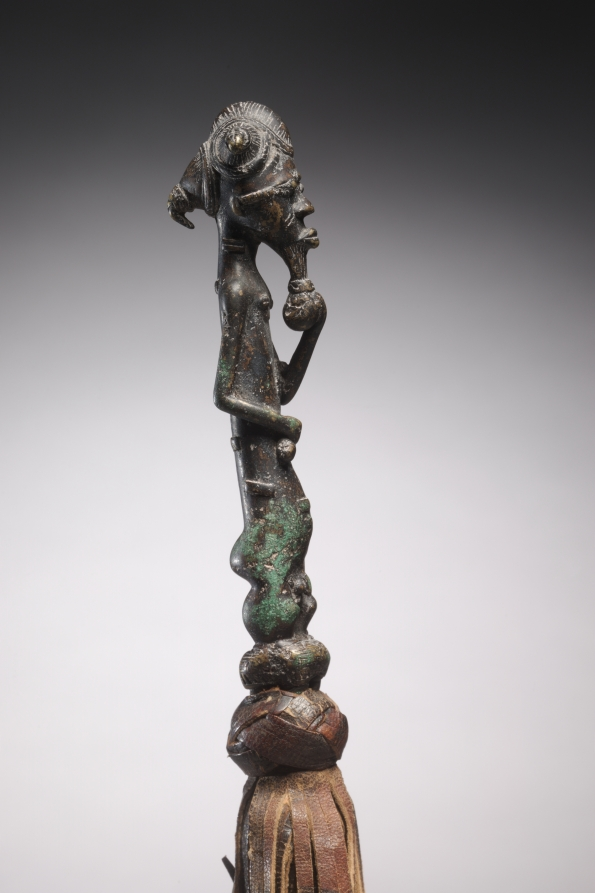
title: Flywhisk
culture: Africa, West Africa, Côte d'Ivoire, Baule-style maker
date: c. 1850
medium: Copper alloy and leather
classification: Sculpture